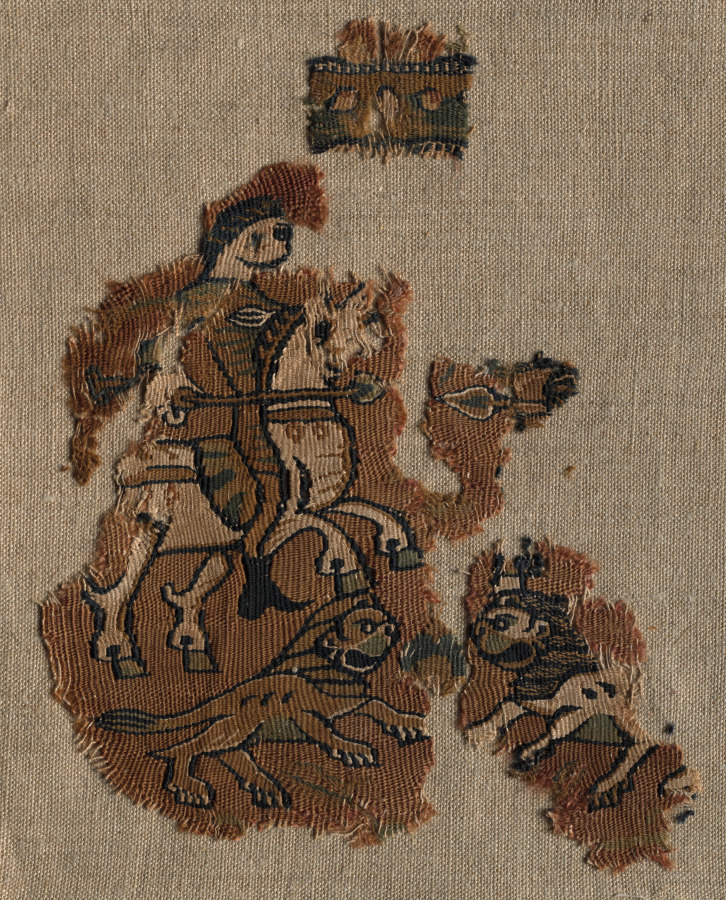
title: Fragmentary Segmentum from a Tunic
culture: Egypt, Abbasid period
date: 750 – 799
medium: tapestry; linen and wool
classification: Textile